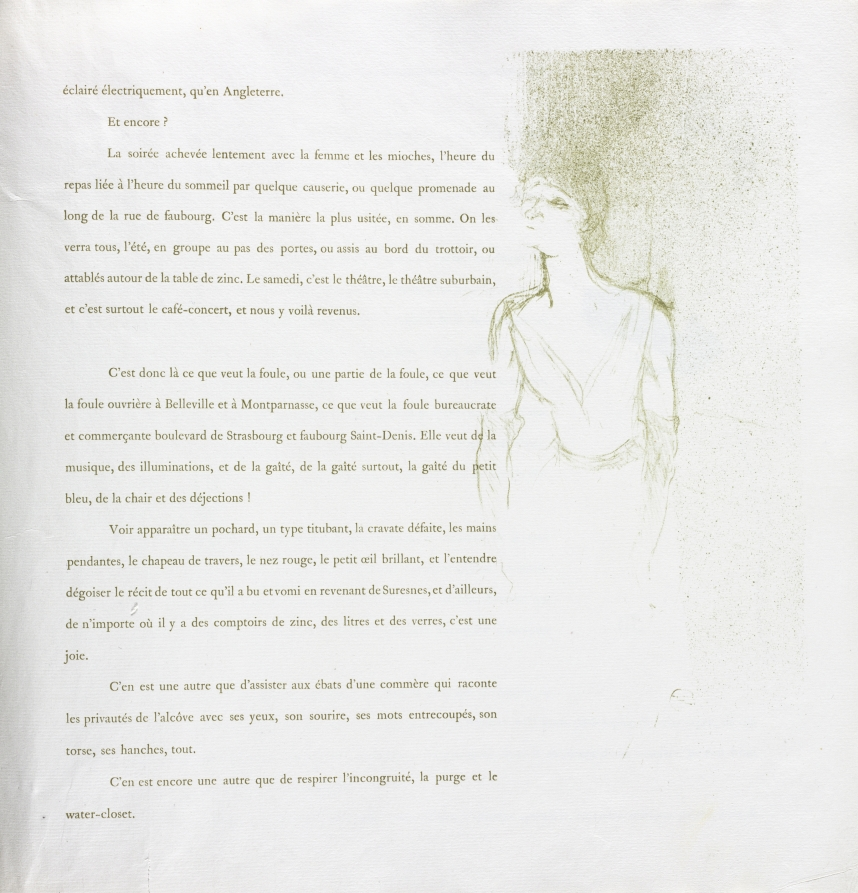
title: Yvette Guilbert-French Series: No. 9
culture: France, 19th century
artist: Henri de Toulouse-Lautrec (French, 1864–1901)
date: 1894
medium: lithograph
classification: Bound Volume